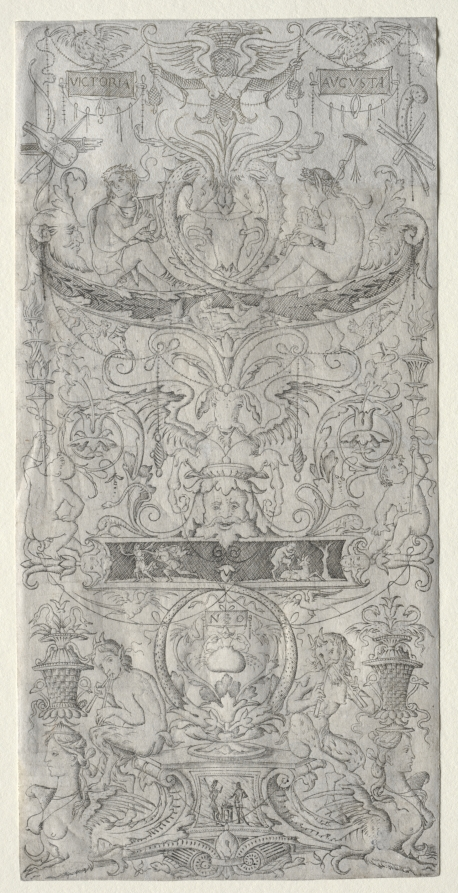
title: Panel of Ornament Inscribed Victoria Augusta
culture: Italy, 16th century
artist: Nicoletto da Modena (Italian, active c. 1500–1520)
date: c. 1507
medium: engraving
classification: Print